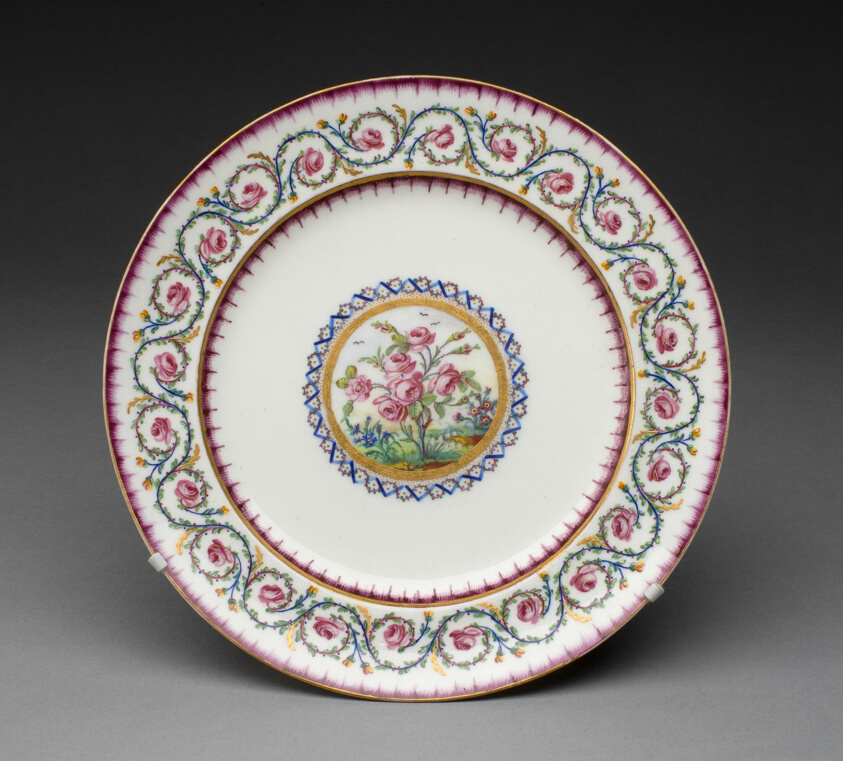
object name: Ceramics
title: Sample Plate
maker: Sèvres Porcelain Manufactory; French, founded 1740; Painted by Charles-Nicolas Buteux; French, active 1763-1801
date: 1790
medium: Soft-paste porcelain, polychrome enamels, and gilding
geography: Sèvres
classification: plate (general, dish); tableware; dish (vessel); ceramics; porcelain; european decorative arts